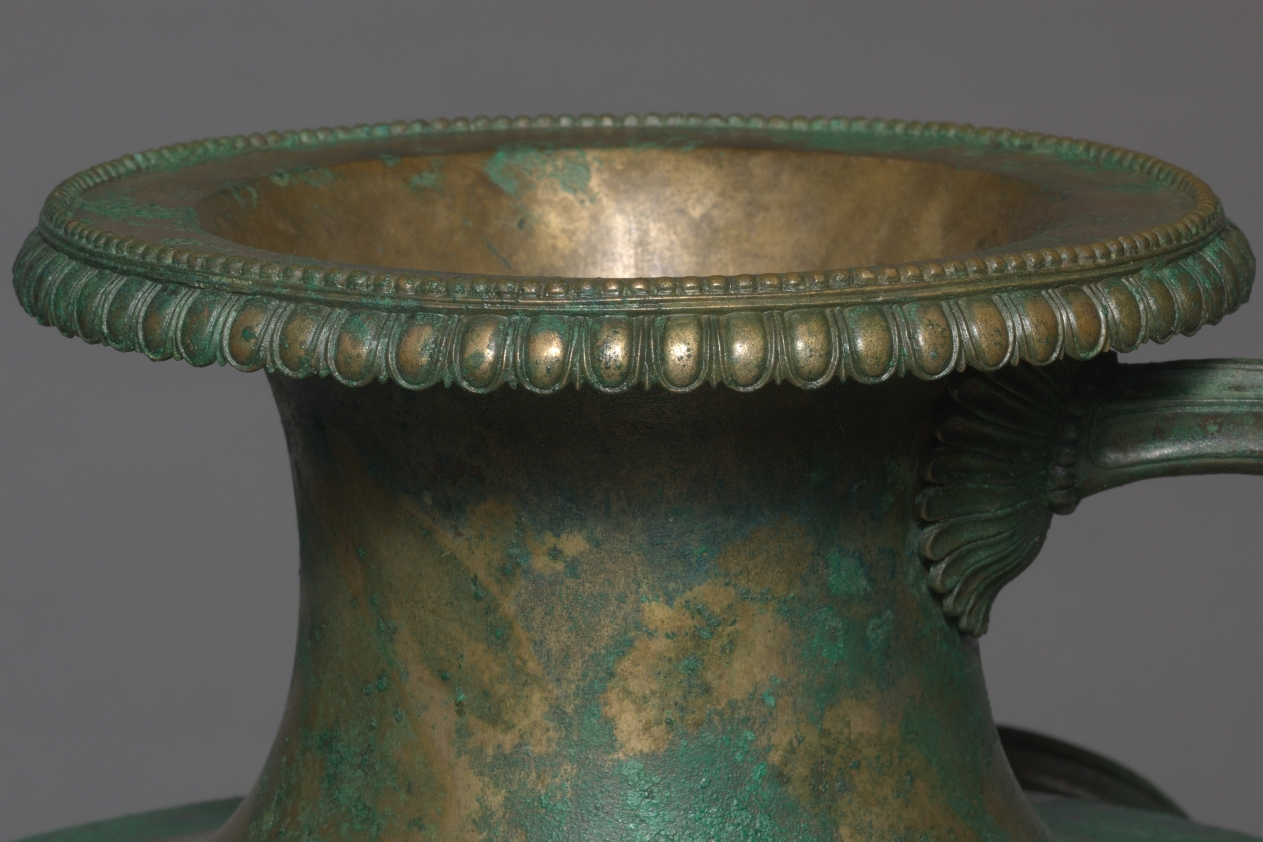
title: Hydria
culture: Greece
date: 425–400 BCE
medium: bronze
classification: Metalwork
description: This vessel gets its name from a shape of earthenware jar that was used to carry water. This bronze hydria was probably used not to carry water but as a cinerary urn (kalpis). The figure on the handle is the mythological siren, a human-headed bird.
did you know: This bronze vessel was likely used as a funerary urn.